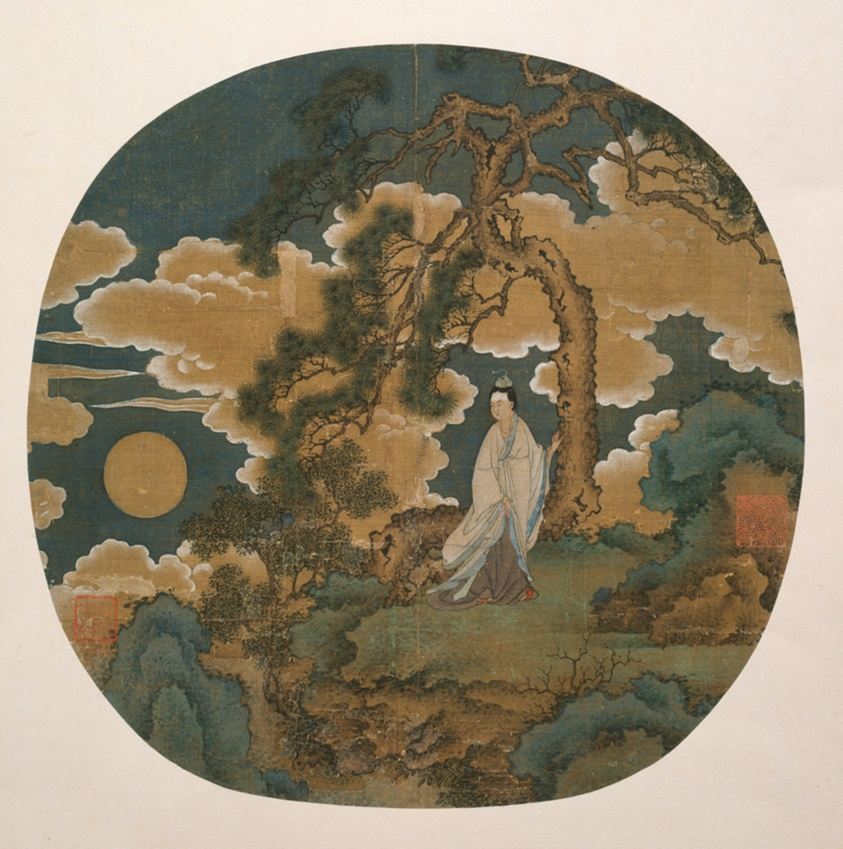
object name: Painting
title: Chang E, The Moon Goddess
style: Chinese (culture or style)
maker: Artist unknown; Chinese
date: Yuan or early Ming dynasty, c. 1350/1440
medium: Album leaf (Fan); ink and colors on silk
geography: China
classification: album leaf; fan; painting; asian art